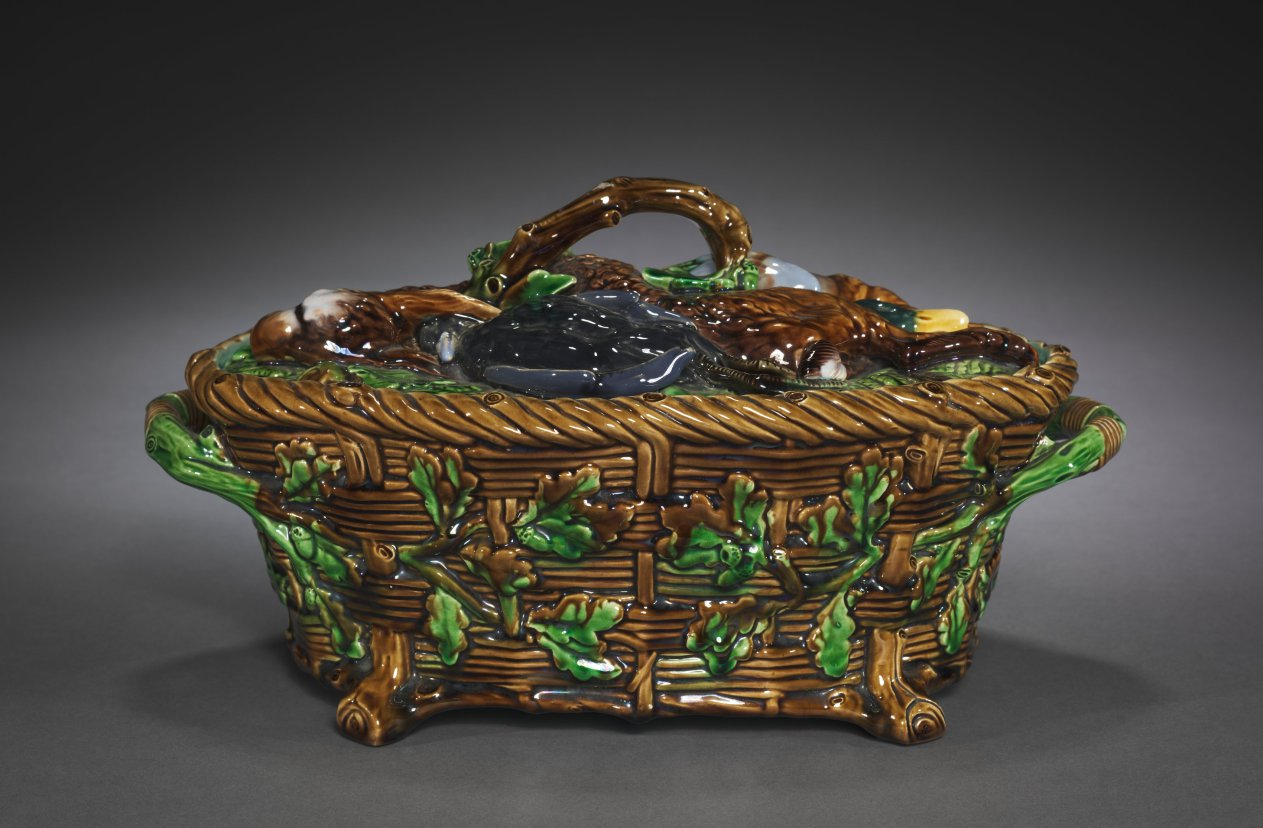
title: Game Pie Dish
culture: England, 19th century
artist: Minton Pottery and Porcelain Factory (British)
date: c. 1860–80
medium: earthenware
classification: Ceramic